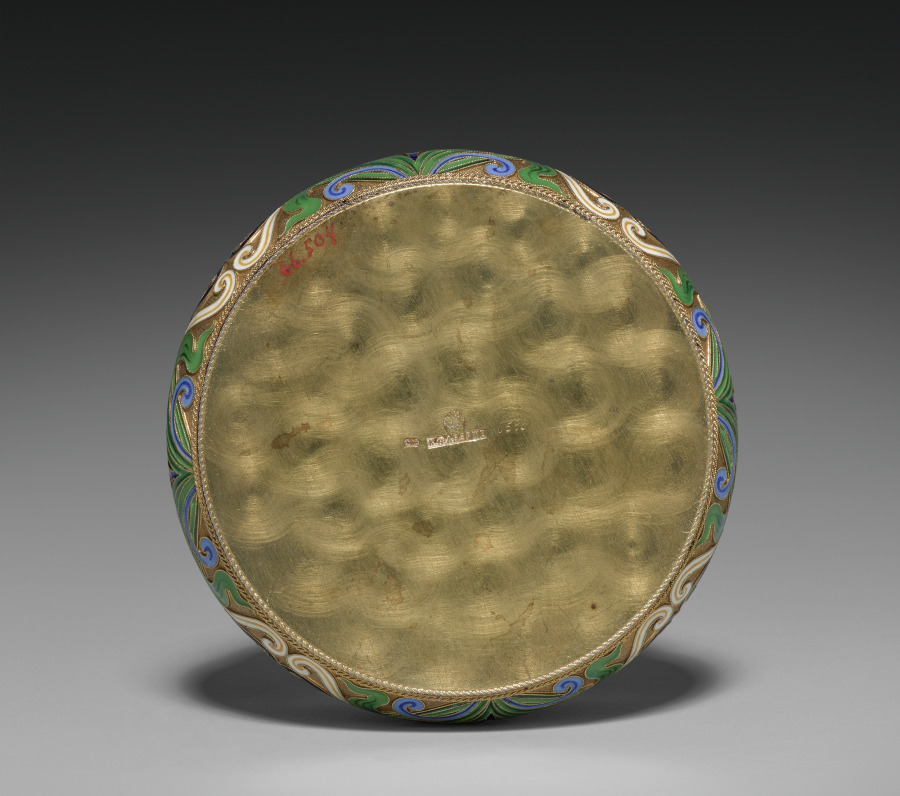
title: Jam (Varenye) Basket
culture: Russia, St. Petersburg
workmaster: attributed to Feodor Ivanovich Rückert (Russian, 1840–1917)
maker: House of Fabergé (Russian, 1842–1918)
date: 1887–96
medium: silver gilt, opaque cloisonné enamel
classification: Miscellaneous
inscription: 84, St. George [assay mark for Moscow, 1882-1896]; C. Fabergé (in Cyrillic); double-headed eagle [imperial warrant]; 10593 scratched.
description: A particularly Russian component of this tea service is this little basket, meant to hold fruit preserved in a sweet juice, called varenye. At Russian tea, varenye was strained and served over cakes or biscuits in a similar way that the English take jam with scones at high tea.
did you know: This jam (varenye) basket is part of a larger tea set.